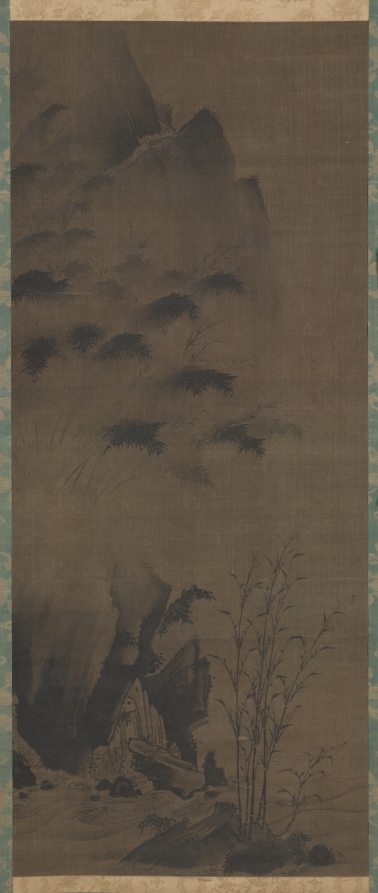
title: Bamboo in Wind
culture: Japan, Muromachi period (1392–1573)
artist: attributed to Genga (Japanese)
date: early 1500s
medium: hanging scroll; ink on silk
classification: Painting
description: East Asian paintings from China, Korea, and Japan were frequently conceived as sets of multiple images. These sets might have been composed for specific palace or temple rooms, or to portray a specific theme, such as the four seasons. Over time, the original intent of such sets is often lost through damage, changes in ownership, or a variety of other reasons. The identity of the artist can also be lost, but then, sometimes, retrieved. This pair of ink paintings has traditionally been labeled as Japanese and attributed to the 16th-century painter Genga. Since there are no seals or signature of the artist on the painting, this attribution was based on comparisons of brush style with paintings known to be by Genga. More recent study indicates that while the 16th century is an appropriate time frame for the pair, the precise cultural identity of the artist is not certain after all. The dark, eccentric shapes of the rocks and bamboo clusters and the dramatic tonal contrasts evident throughout the composition point to either Korean authorship or influence upon a Japanese painter of the period.